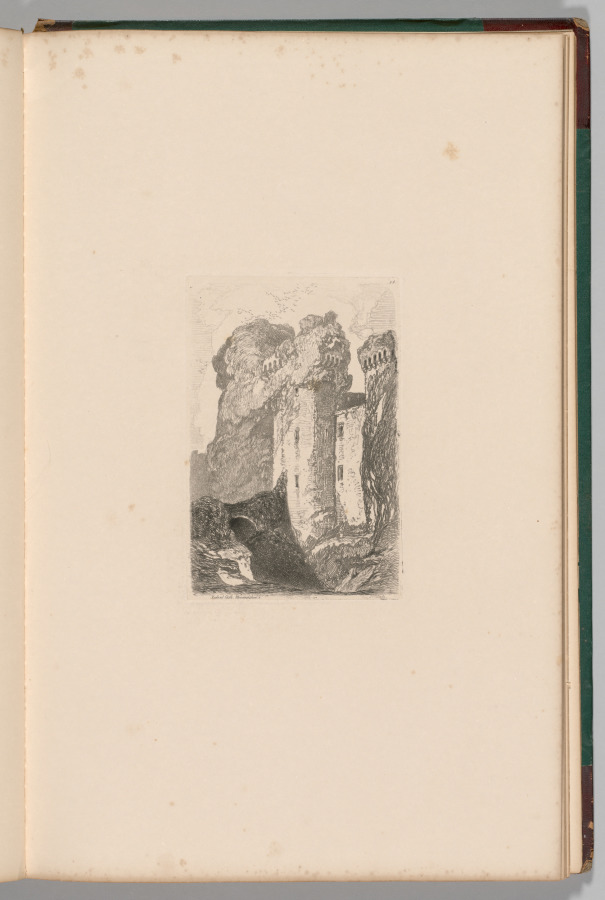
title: Liber Studiorum: Plate 24, Ragland Castle, Monmouthshire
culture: England, 19th century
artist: John Sell Cotman (British, 1782–1842)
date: 1838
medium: softground etching, from a bound volume containing 48 plates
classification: Bound Volume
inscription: In plate, within image, upper right: 24; in plate, lower left, below image: Ragland Castle, Monmouthshire; in plate, lower right, below image: J S Cotman